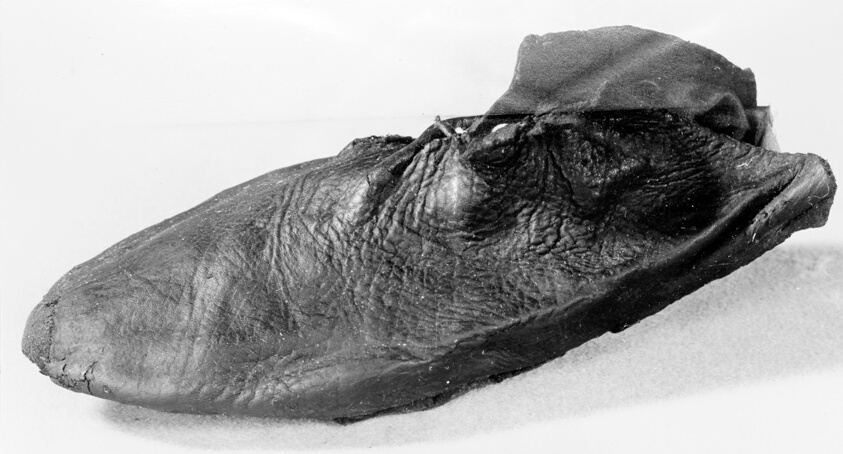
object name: Textile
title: Shoe (Toe)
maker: England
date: 16th century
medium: Leather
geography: England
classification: textile; costume accessory - shoe; shoes - misc; costume; dress (garment); clothing